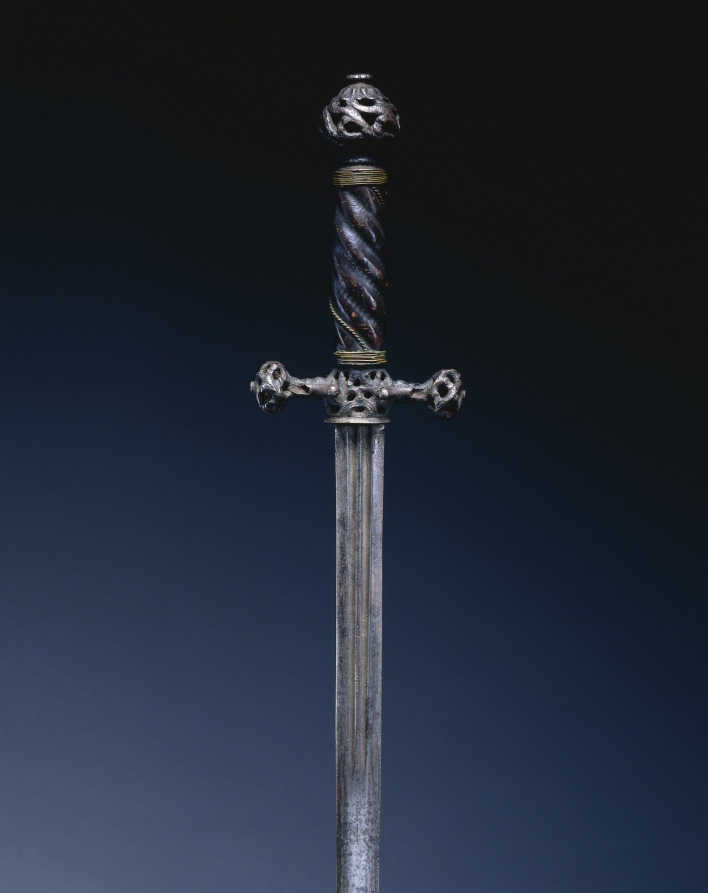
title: Pillow Sword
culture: Italy, 17th century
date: c. 1650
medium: steel, pierced; leather and wood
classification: Arms and Armor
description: The "pillow-sword" is so-named because of where it was kept. A sword like this one, with a straight blade and relatively simple hilt, would have been suspended above a headboard within arm's reach for bedside defense should an intruder attack while the household was asleep and vulnerable.